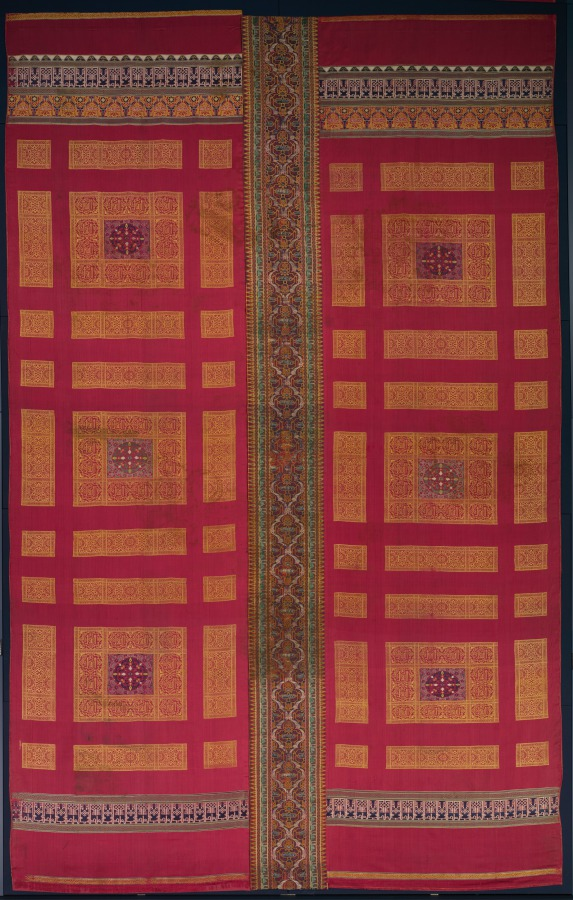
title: Alhambra Palace Silk Curtain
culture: Spain, Granada, Nasrid period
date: mid-1300s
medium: silk; lampas weave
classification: Textile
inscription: the bold knotted Kufic inscription in the top and bottom borders of the side panels repeats the Arabic word "felicity." Within the arches forming a frieze in the top border is a Kufic inscription "good fortune" and a Naskhi inscription repeating trhe motto of the Nasrid dynasty, "There is no conqueror but God." In the borders of the three large ornamental rectangles on each side panel is the Naskhi inscription "Dominion belongs to God alone." On the central panel the inscriptions in the borders repeat the phrase, "Majestry is God's," while the Nasrid motto, "There is no conqueror but God" and, above, "Blessing," are inscribed in the arabesque ogives.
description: This is one of two of the largest, most complete, and most ornate curtains to survive from the 1300s when it presumably hung in the royal Alhambra Palace in Granada, the last Muslim stronghold in Spain. Its style, artistic vocabulary, and harmonious proportions reflect the magnificent wall decoration in the Alhambra. The motto of the ruling Nasrid dynasty, "There is no conqueror but God," is inscribed in the end borders and central panel. The inscribed striped silk forming the central panel is more worn, suggesting that it was recycled, most likely during the 1300s.